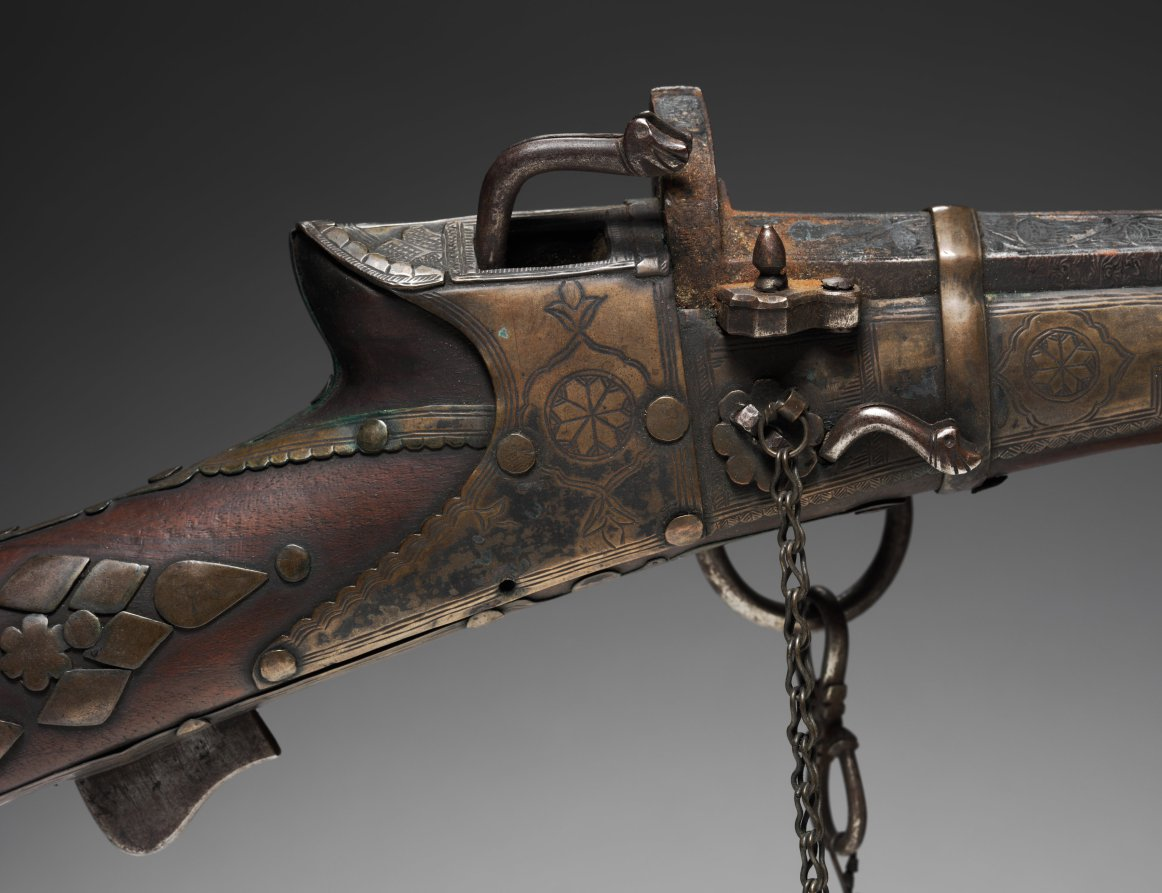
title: Matchlock Musket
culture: Turkey, Ottoman period (1299–1922)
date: c. 1750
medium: Wood, steel, brass, mother-of-pearl inlay, and leather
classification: Arms and Armor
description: Collectively, the Safavid, Mughal, and Ottoman empires are known as the Gunpowder Empires. Particularly from the 1500–1700s, they were among the strongest economic, cultural, and militaristic powers. Each trained and equipped their armies with the latest gunpowder firearms, particularly cannons and muskets. While used in battle, muskets were also used for leisure activities, particularly hunting. The decoration on this musket suggests it was a courtly item, fitted with a leather pad to protect the shooter from the force of the explosion after firing.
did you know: A matchlock musket was loaded from the muzzle end with a scouring stick kept in a sleeve on the underside of the barrel.